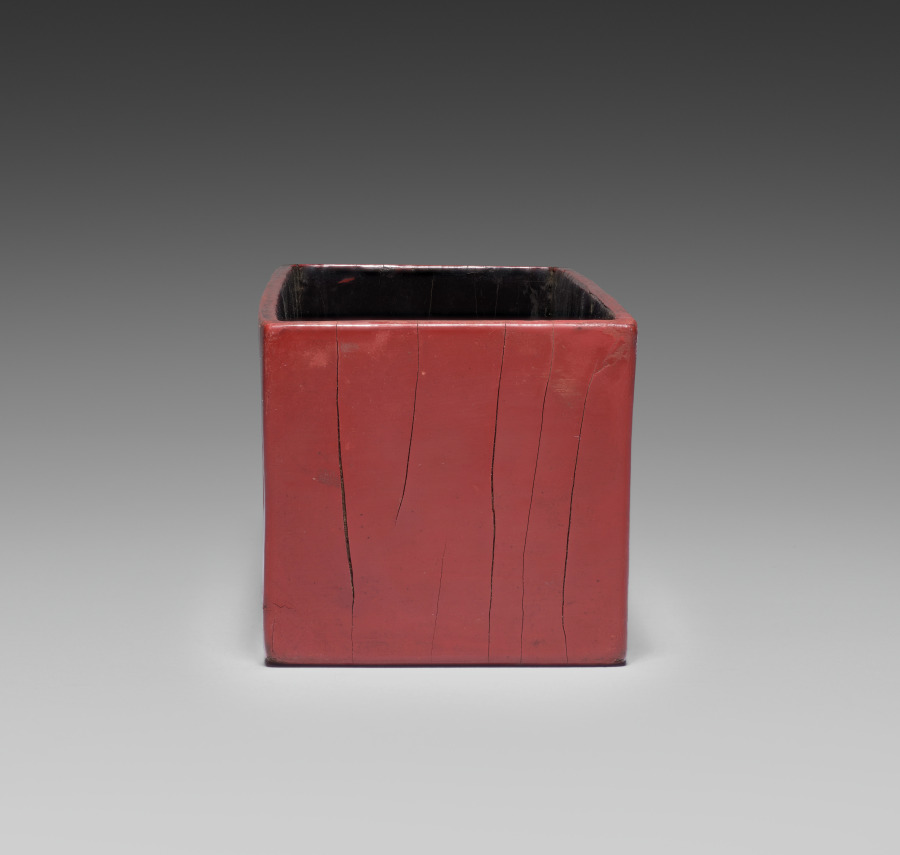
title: Drawer for a Tihong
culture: China, Ming dynasty (1368-1644), Wanli reign (1572-1620)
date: 1585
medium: carved cinnabar lacquer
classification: Lacquer